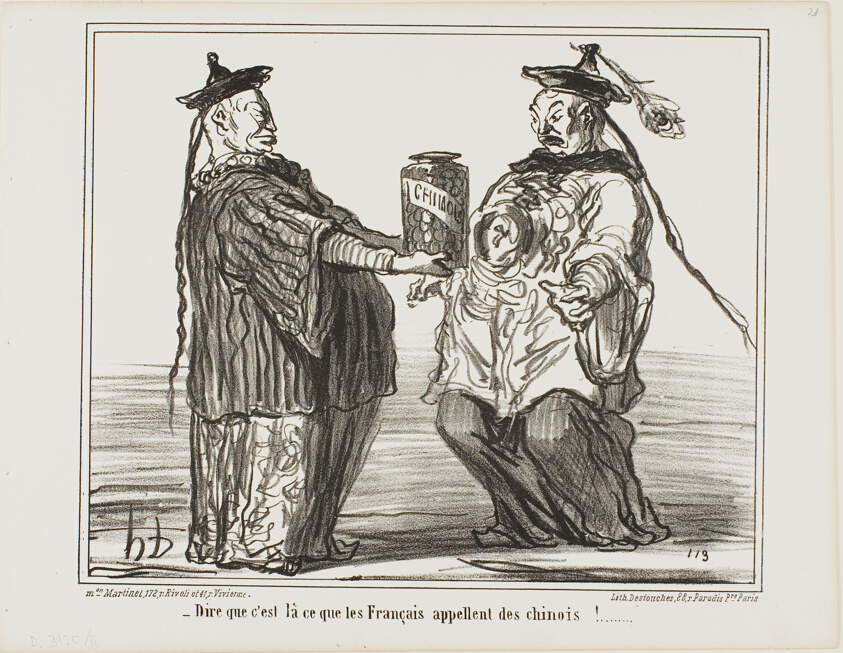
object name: Print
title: Strange.. this is what the French call "Chinois,” plate 21 from En Chine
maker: Honoré Victorin Daumier; French, 1808-1879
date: 1859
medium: Lithograph in black on white wove paper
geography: France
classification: lithograph; print; prints and drawing